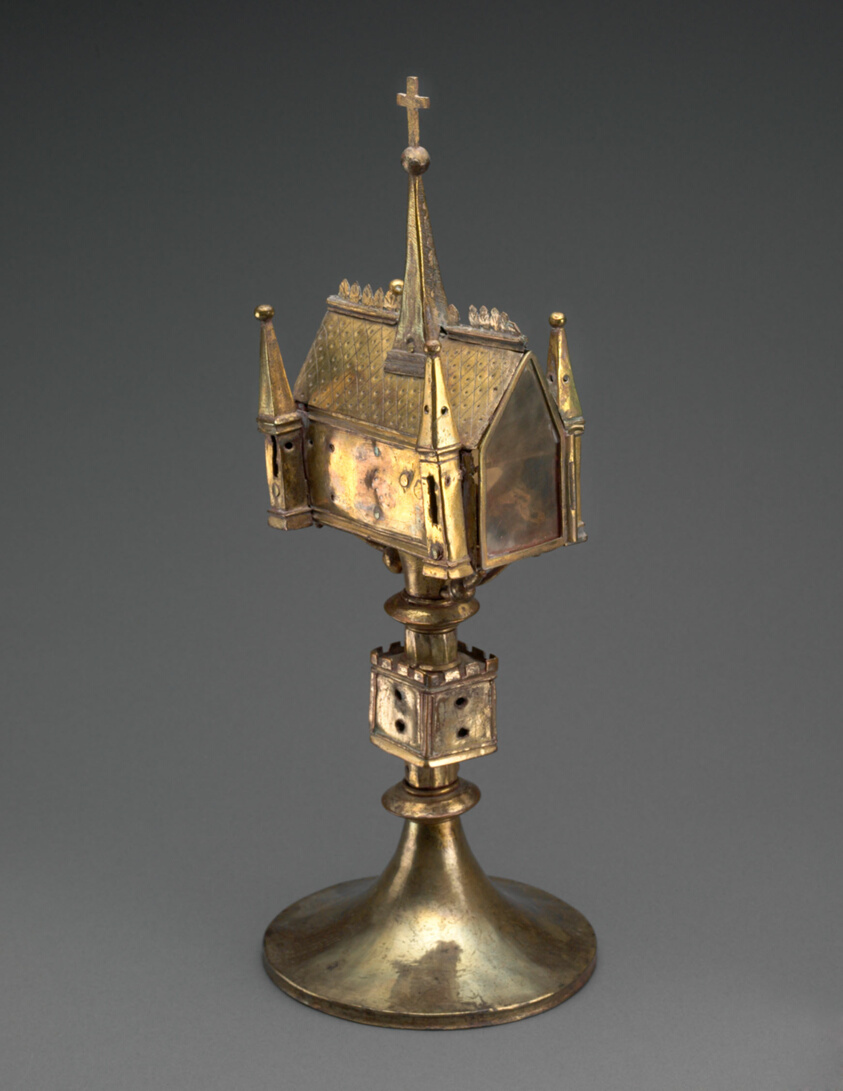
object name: Decorative Arts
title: Reliquary Monstrance in the form of a Church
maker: German, Brunswick (Braunschweig)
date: c. 1484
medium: Gilt copper and horn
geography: Brunswick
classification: metalwork; european decorative arts; decorative arts